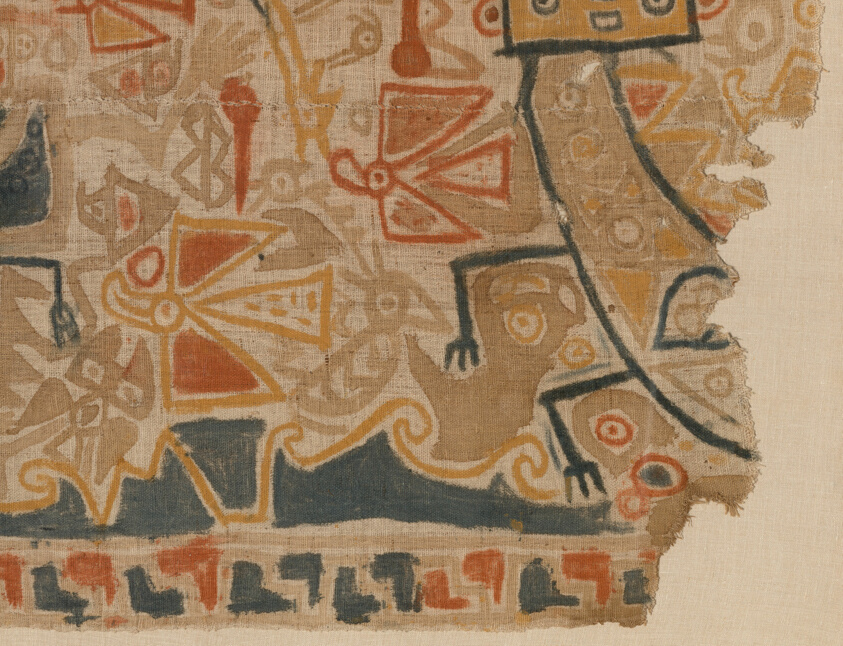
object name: Textile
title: Painted Textile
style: chimú capac, Arts of the Americas, andean, peruvian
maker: Probably Chimu Capac, Supe Valley, north coast, Peru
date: c. 1000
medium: Cotton, plain weave; painted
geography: Peruvian North Coast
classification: textile; cotton; art of the americas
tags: figures (representations), feline, birds, waves, serpents